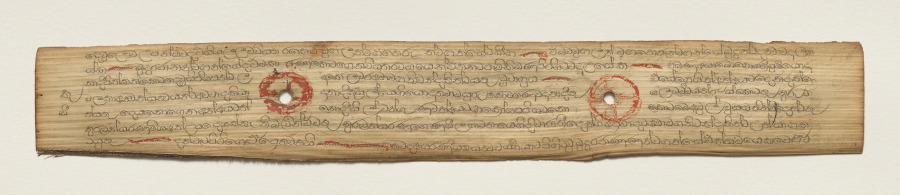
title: Leaf from a Buddhist Manuscript (recto)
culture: Sri Lanka, Singhalese, Late 17th century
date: c. 1700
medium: fiber paper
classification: Manuscript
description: Palm leaf material is still used for manuscripts in Sri Lanka. The palm leaves are prepared first by boiling them, drying them in the sun, and then rubbing them with oils. Scribes then use a metal stylus to incise the text. Then charcoal powder is wiped across the pages, filling in only the inscribed lines.